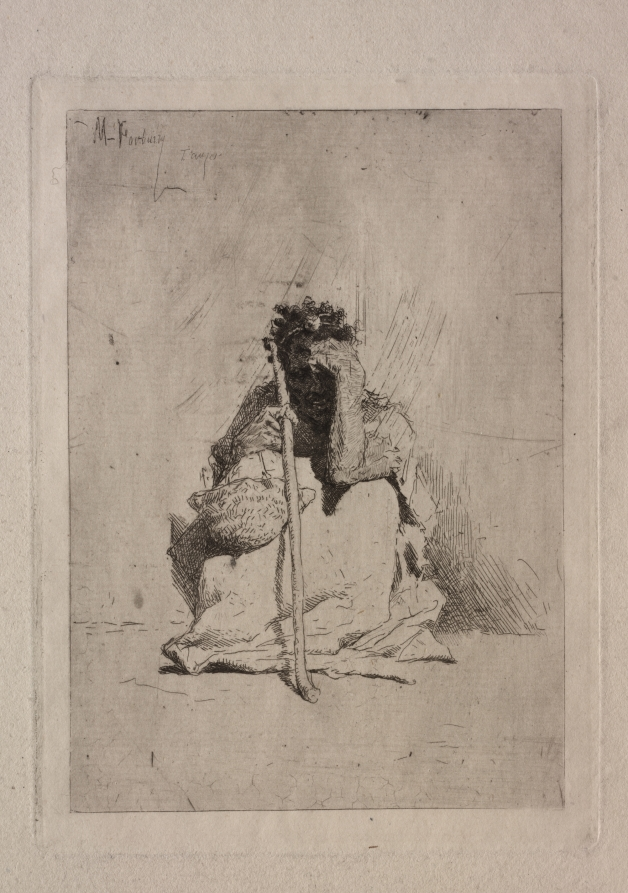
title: Beggar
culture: Spain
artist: Mariano Fortuny (Spanish, 1838–1874)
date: c. 1862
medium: etching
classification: Print